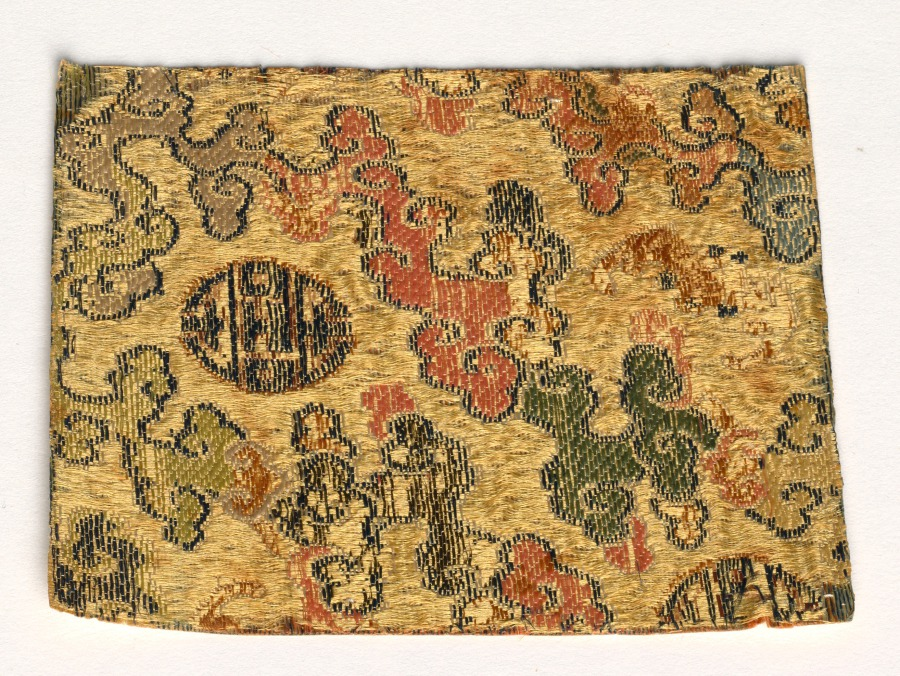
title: Fragment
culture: China, Qing dynasty (1644-1911)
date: 1700–1720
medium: Silk, diaper weave; satin ground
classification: Textile